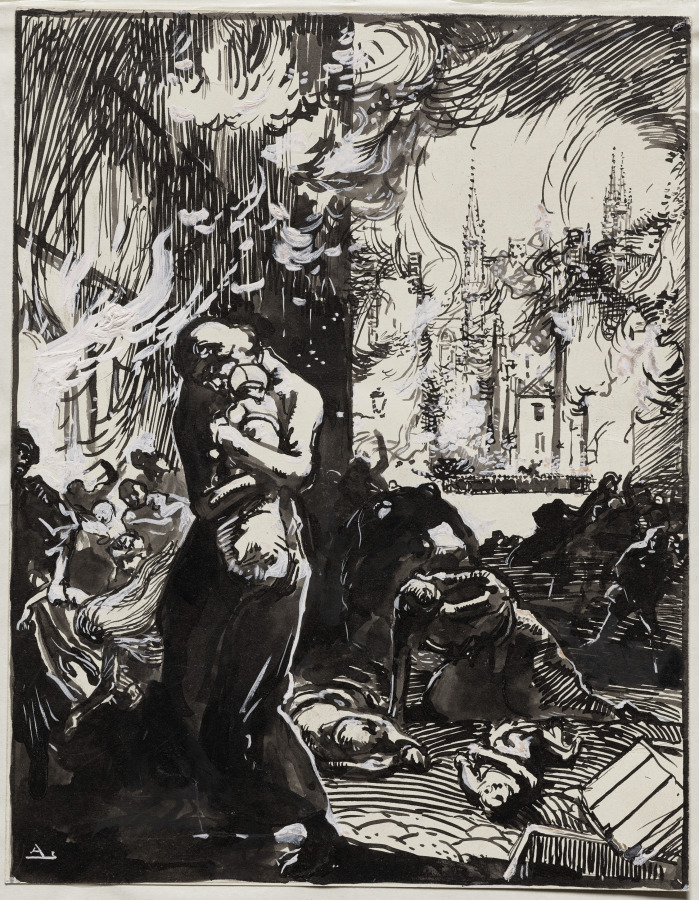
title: L'Incendie de Louvain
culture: France, 20th century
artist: Auguste Louis Lepère (French, 1849–1918)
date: 1914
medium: pen and brush and black ink with white highlights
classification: Drawing